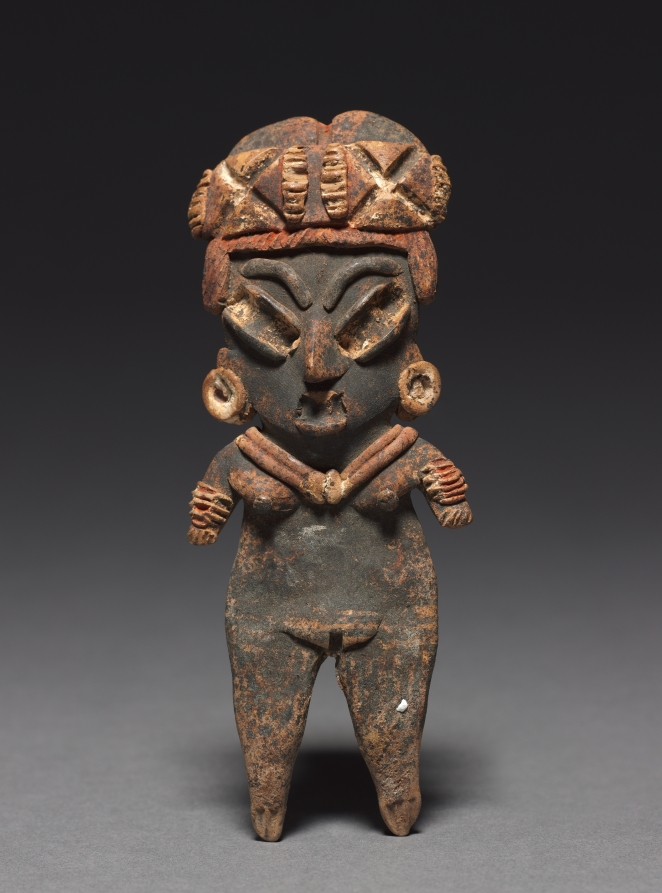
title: Archaic Figurine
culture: Mesoamerica, Mexico, Guanajuato, Chupícuaro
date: 400–100 BCE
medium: earthenware with pigments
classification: Ceramic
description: Burials from ancient villages near Chupicuaro, Guanajuato contain hundreds of pottery offerings. These include brightly colored vessels and solid figurines decorated with appliqué and incision. The cheerful, informal figurines were probably intended to provide the dead with companionship, and to remind them of their loved ones.